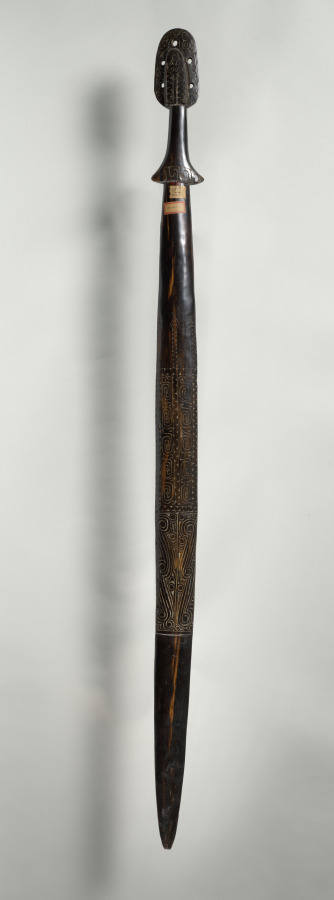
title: Club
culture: Melanesia, New Guinea, Massim Area, Trobriand Islands, 20th century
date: before 1930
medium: wood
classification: Sculpture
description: Craftsmen from the Trobriand Islands (off the coast of eastern New Guinea) decorated both utilitarian and ceremonial objects with elegant incised patterns. Usually these wooden objects were red or deep black in color. The engraved designs, depicting stylized frigate birds or human faces and figures, are infilled with lime. Drums, dance wands, shields, and canoe ornaments, together with spells and incantations, were part of the hereditary wealth of local Massim chiefs.